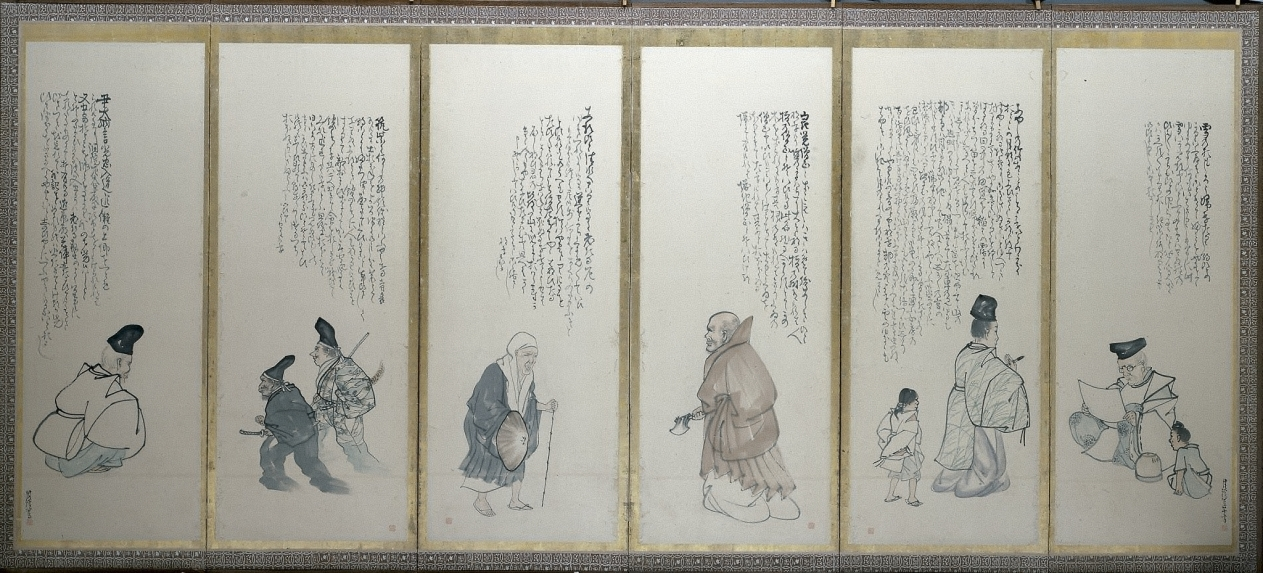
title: Scenes from Essays in Idleness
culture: Japan, Edo period (1615–1868)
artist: Matsumura Goshun (Japanese, 1752–1811)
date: late 1700s–early 1800s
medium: One of a pair of six-panel folding screens; ink and color on paper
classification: Painting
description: Matsumura Goshun inscribed passages from Buddhist monk Yoshida Kenkō’s (1283–1350) well-known collection of anecdotes, Essays in Idleness, across the top of the panels of this screen and its pair. Goshun illustrated the narratives with his vision of the figures who feature in them. The texts cascade down from right to left, forming unique compositional relationships with the images below. The episodes offer a veritable portrait of human idiosyncrasy, from one man’s deep faith in radishes to another’s inability to avoid nicknames.